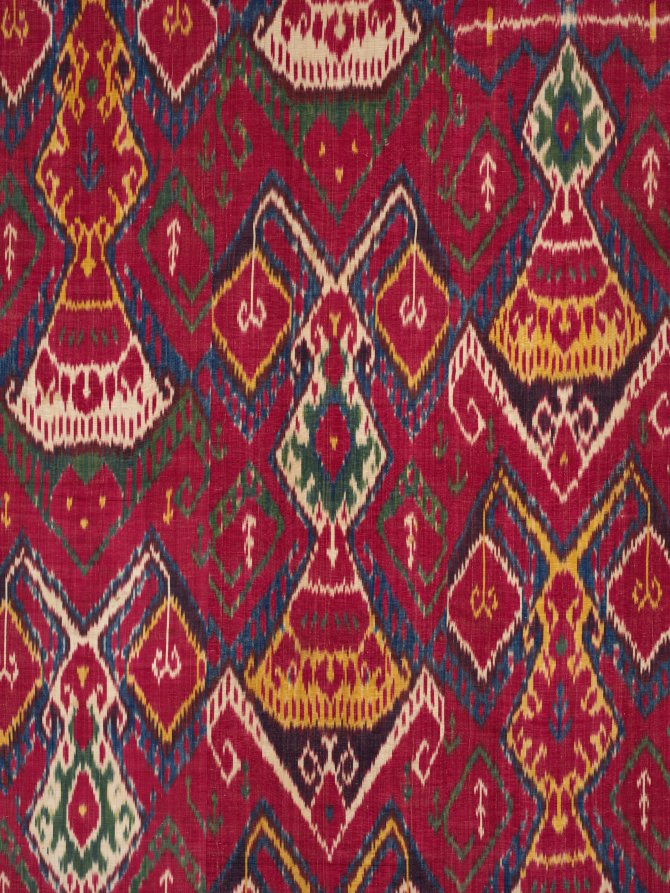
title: Wall Hanging (pardah)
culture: Uzbekistan, Bukhara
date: 1800–1850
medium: Silk: warp-faced plain weave, warp-ikat; cotton weft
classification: Textile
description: Dazzling patterns with saturated colors in the ikat technique provided vibrant wall hangings in reception rooms of the urban elite in Central Asia. In this splendid example composed of five loom widths, the three central lengths display a precise design of amulets complemented by palmettes in the two outer lengths. The irregular contours, telltale indicators of ikat, are masterfully controlled with five rich colors, illustrating the high quality of the earliest known examples in Central Asia from the first half of the 1800s. In the ikat technique, the design was dyed on the warp before it was woven in a resist-dye process. Thread was tightly wrapped around the warp to resist dye penetration for each area of color. This labor-intensive process created hangings and garments cherished for their vibrant colors with "fuzzy" contours.